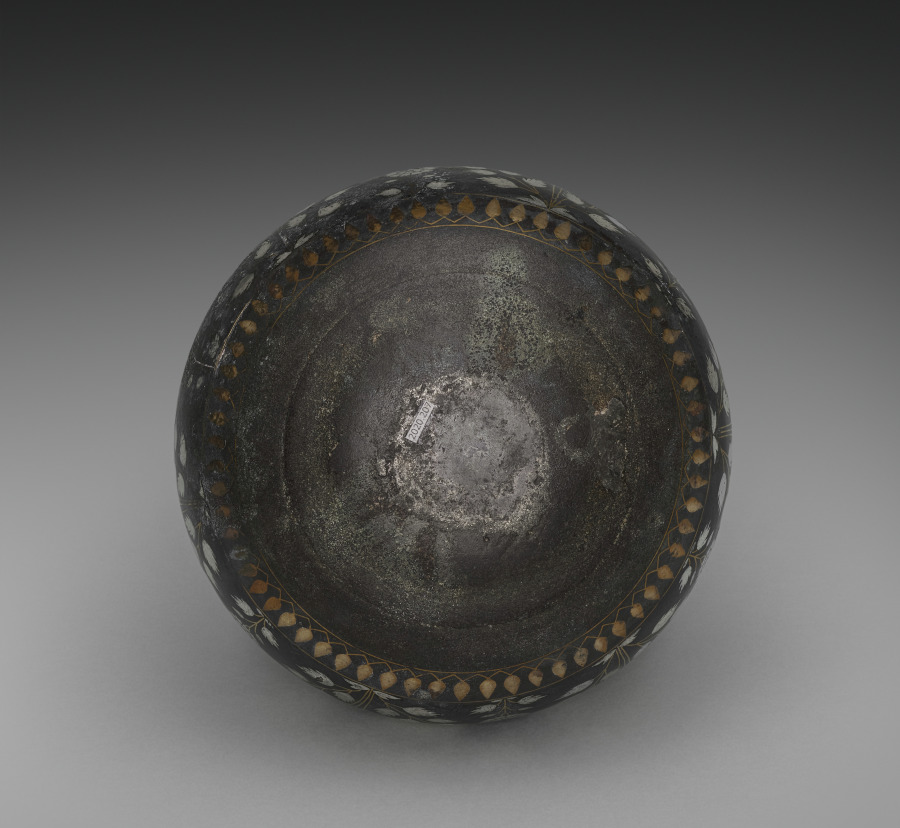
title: Bidri Hookah Bowl with Roses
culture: Southwestern India, Deccan, Karnataka, Bidar​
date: c. 1650s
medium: Zinc alloy with silver and brass inlay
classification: Metalwork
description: Hookah bowls were used for the enjoyment of tobacco or any other smoked substance during moments of relaxation. They were also aesthetic objects to be admired in elite gatherings of connoisseurs. The flowering rose bushes on this fine early example, made shortly after the introduction of tobacco-smoking in India, would have called to mind celebrated poetical works, such as the Gulistan (Rose Garden) of Sa'di (Persian, 1210–1291 or 1292).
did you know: Bidri ware is cast from condensed vapors of zinc mined from Sawar in Rajasthan.